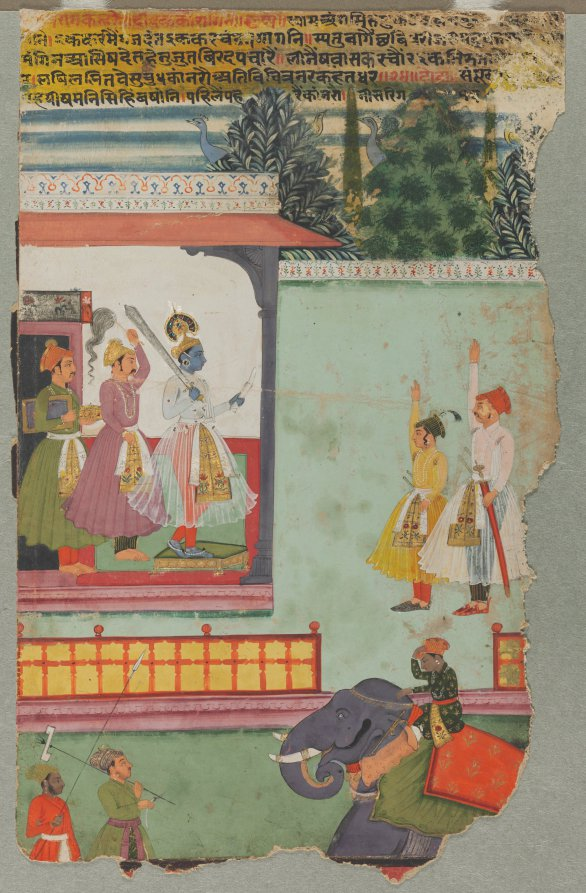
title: Kanhra Ragini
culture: India, Rajasthan, Amber, early 18th Century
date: c. 1700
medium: Gum tempera, ink, and gold on paper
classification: Painting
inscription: recto, across top: